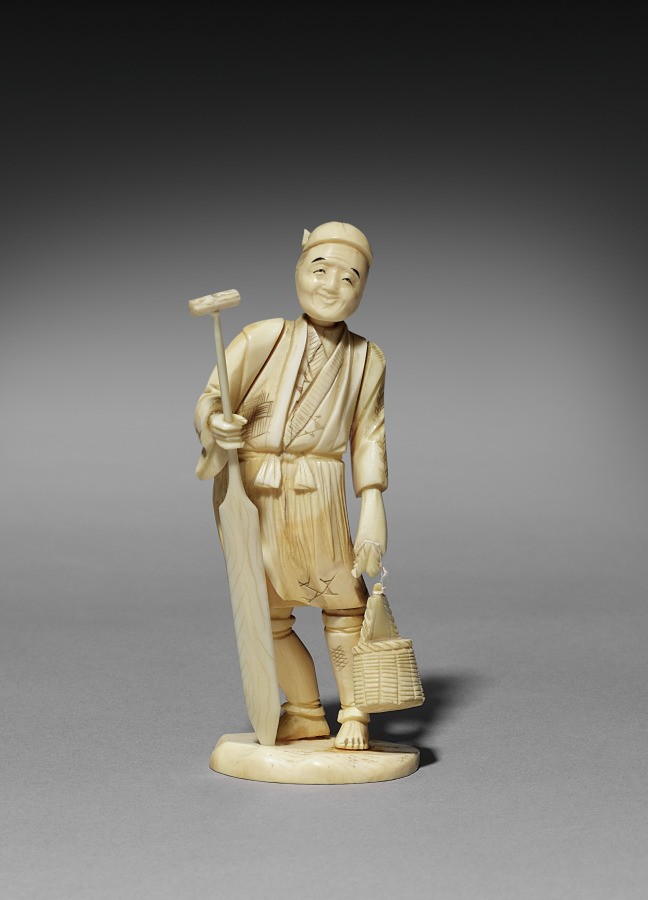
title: Man with a Basket and Paddle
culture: Japan, Meiji period (1868–1912)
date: late 1800s-early 1900s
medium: ivory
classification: Ivory